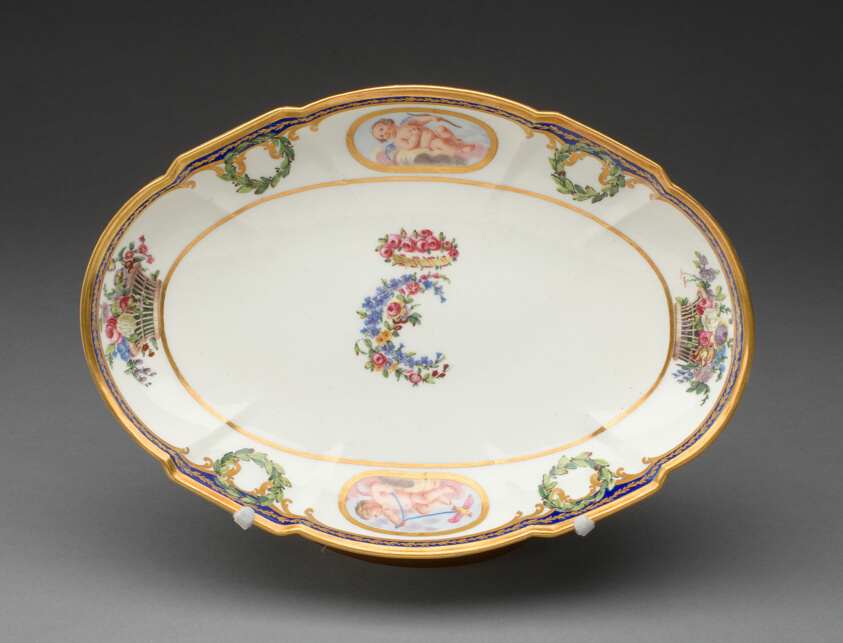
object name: Ceramics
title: Dish from the Charlotte Louise Service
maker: Sèvres Porcelain Manufactory; French, founded 1740; Painted by Charles Buteux (French, active 1756-1782)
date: c. 1774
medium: Soft-paste porcelain, polychrome enamels, and gilding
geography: Sèvres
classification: dish (vessel); tableware; ceramics; porcelain; european decorative arts